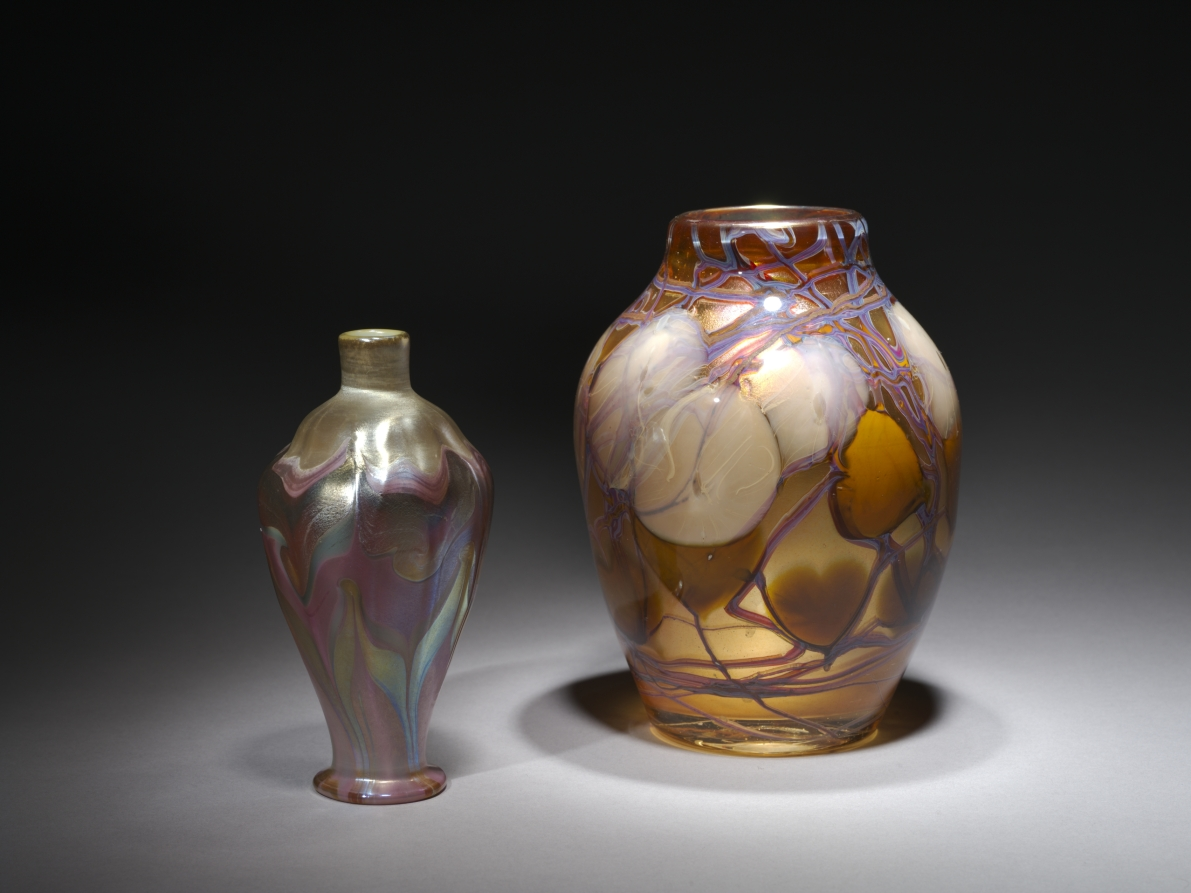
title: Vase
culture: America, New York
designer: Louis Comfort Tiffany (American, 1848–1933)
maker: Tiffany Studios (United States, New York, 1902–32)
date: c. 1905–10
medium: favrile glass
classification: Glass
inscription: inscribed on base: Louis C. Tiffany; L.C.T.; L301.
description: This small vase is made of Louis Comfort Tiffany's signature Favrile glass. Early on when Tiffany began collaborating with glass artists on new types of production, his aesthetic ambitions were realized in the development of Favrile glass, deliberately named to sound French, expensive, and “handmade.” Largely through Tiffany's marketing ability, Favrile glass became America’s greatest contribution to the Art Nouveau style. His works were exhibited at international expositions; galleries in major European cities, where his creations were bought by many museums; and in his store in Manhattan, known as the Tiffany Glass and Decorating Co., later Tiffany Studios. Along with the many shapes and sizes of his decorative vases, Tiffany used Favrile glass in mosaic panels, stained glass windows, and his artistic line of table and floor lamps.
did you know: Introducing various chemicals into the molten glass within the furnace produced multicolored iridescence on the surface when this vase was blown and cooled.